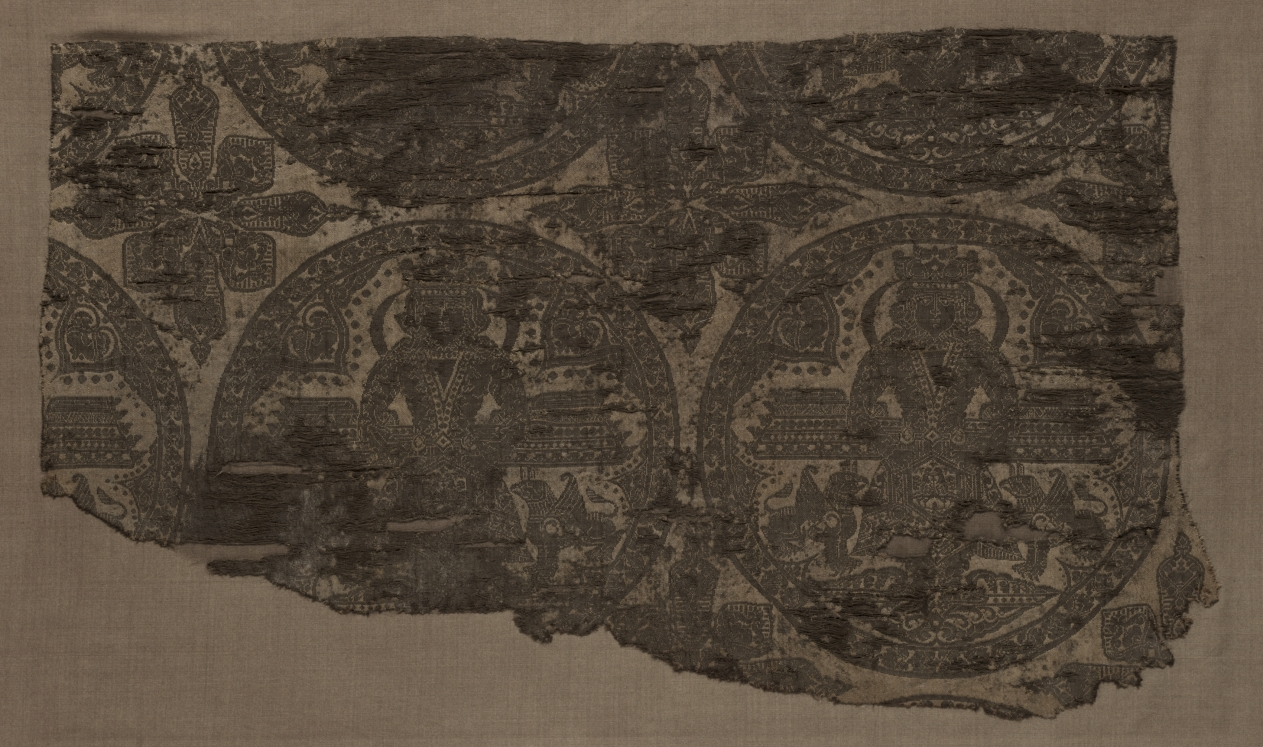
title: Enthroned King Flanked by Griffins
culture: Iran or Iraq, in the style of the Abbasid period (750–1258)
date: prior to 1971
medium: Silk: lampas weave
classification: Textile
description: This textile fragment preserves one complete and portions of 5 aligned roundels arranged in two rows (the top row fragmentary). Each roundel depicts an enthroned king flanked by crescents from his crown and griffins at his knees. Each king's robe and throne are ornamented with geometric patterns. Filling areas over the shoulders and at the feet of the king are stylized floral motifs outlined with pearls. The border is ornamented with stylized floral scroll. Interspaces contain an eight-pointed medallion. According to recent analysis of the museum’s Buyid and Abbasid textile materials, some have been identified as modern reproductions.